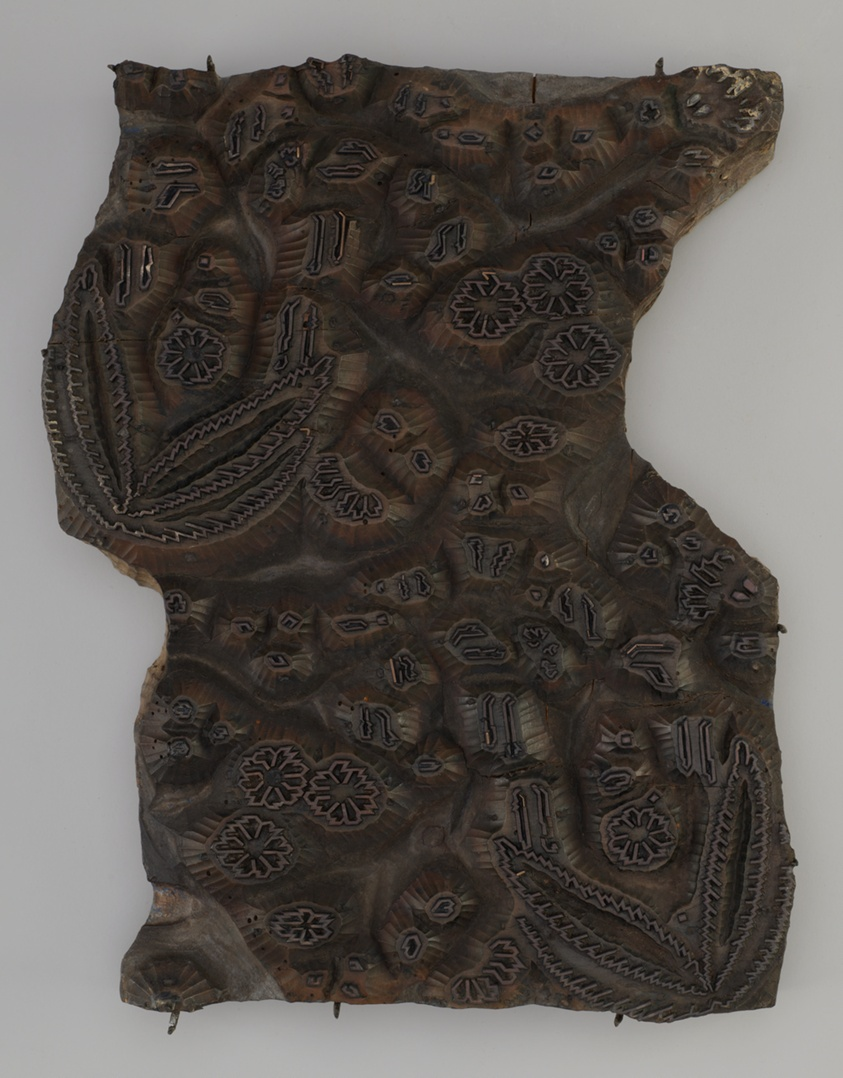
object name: Textile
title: Six Printing Blocks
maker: England or France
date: before 1850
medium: Carved wood, treated in a variety of techniques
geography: England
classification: printing blocks (printing surfaces); textile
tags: paisley